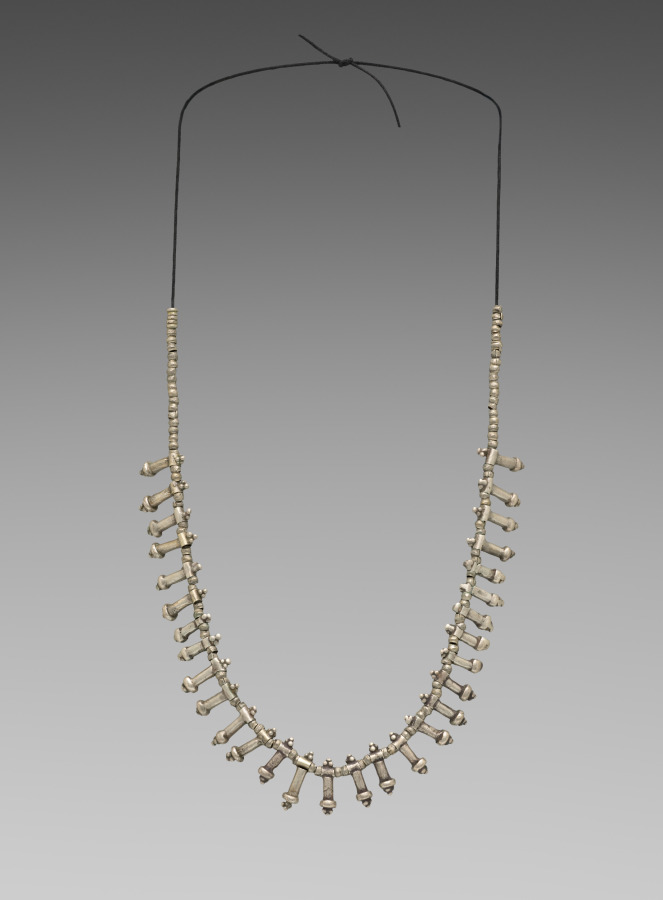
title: Necklace with beads (sadi?)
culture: Africa, East Africa, Ethiopia, unknown silversmith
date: late 1800s or early 1900s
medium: silver alloy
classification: Jewelry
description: This necklace has an abundance of phallic beads representing fertility framed by dozens of smaller silver beads. Specialists in gold and silver would melt silver into small balls that were then attached to drawn rods of metal. Atop each bead is a pile of small granulations; these tiny metal spheres are small like pieces of grain.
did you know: There are no local sources of silver in Ethiopia.